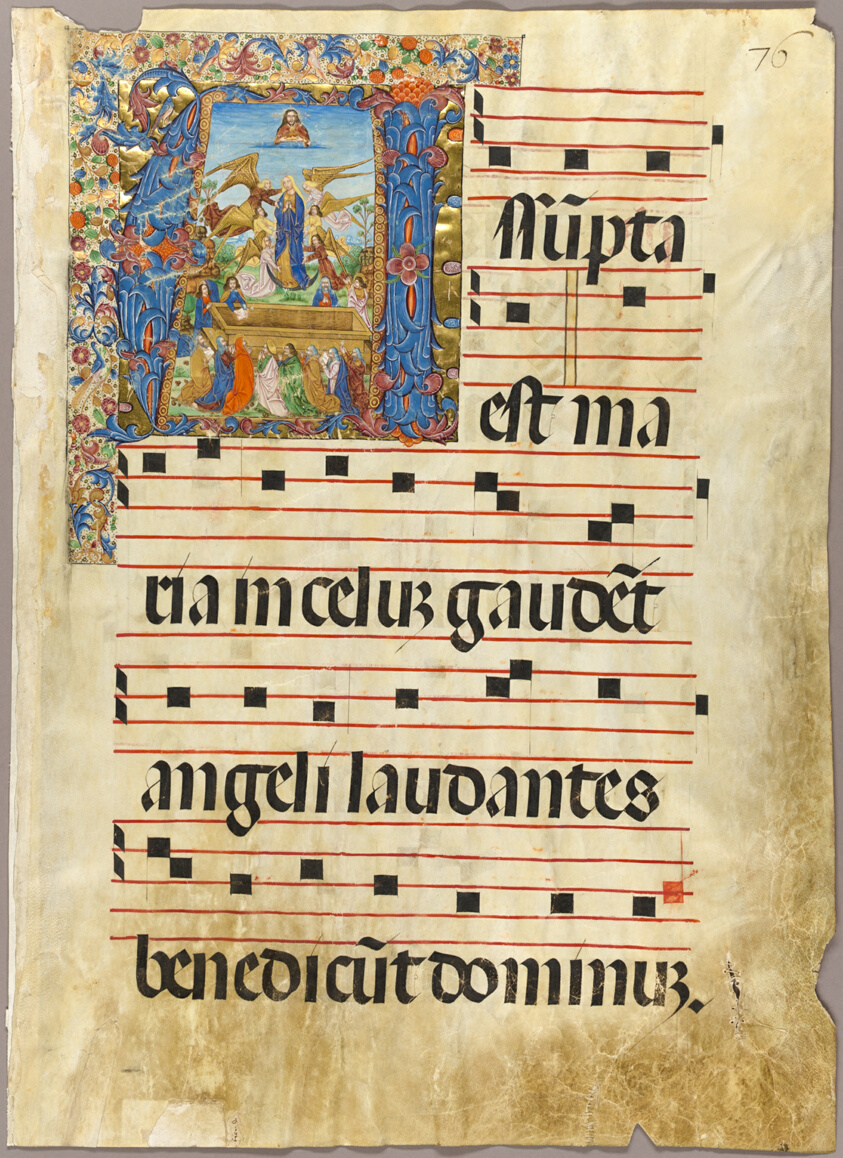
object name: Drawing and Watercolor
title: The Assumption of the Virgin in a Historiated Initial from a Gradual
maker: Spanish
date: c. 1500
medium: Manuscript cutting in tempera and gold leaf, with gothica textura inscriptions in Latin in black ink, ruled in red, with red rubrics and other decorations, on parchment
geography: Spain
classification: watercolor; drawings (visual works); prints and drawing